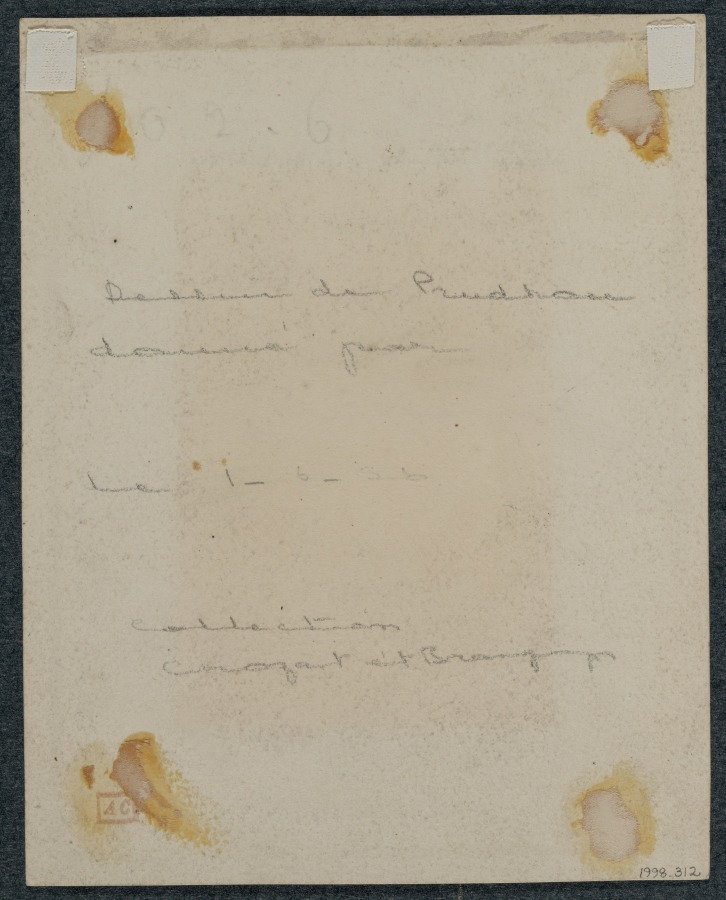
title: Mythological Scene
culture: France, 17th century (?)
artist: Louis Cheron (French, 1660–1713)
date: 1600s?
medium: pen and brown ink and brush and gray wash; framing lines in brown ink and gray wash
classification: Drawing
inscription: VERSO, upper left, in graphite: [illegible]02 . 6 ; down center, in graphite, across entire sheet: Dessin de Prudhon / donn[a?] par / Le 1_6_36 / collection / Crozat et Br[illegible]